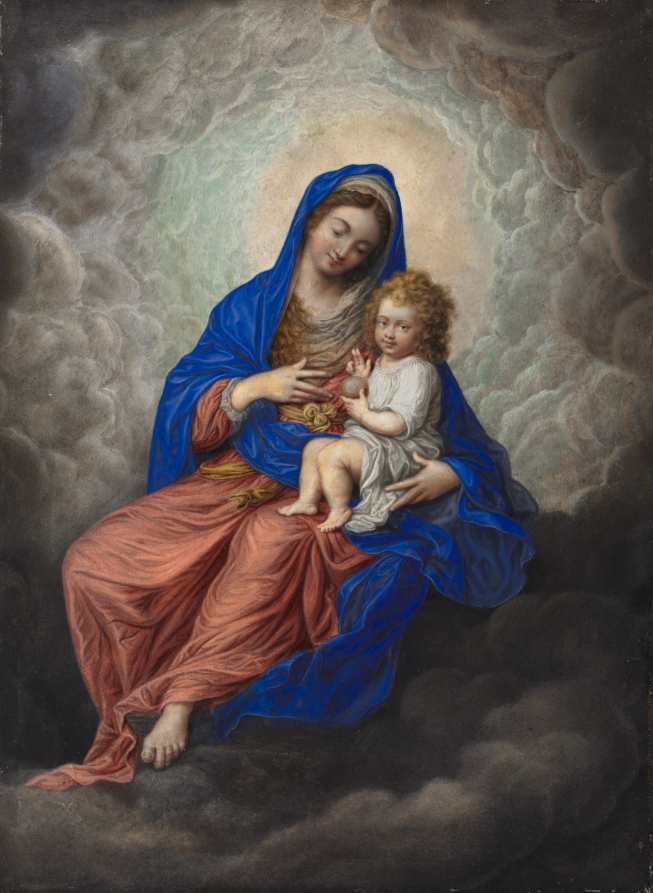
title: Madonna and Child in Glory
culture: England, 17th century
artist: Isaac Oliver (French, c. 1565–1617)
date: c. 1605–1617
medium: gouache and watercolor, heightened with gum arabic, with shell gold framing lines, on vellum, mounted on paper, vellum, and wood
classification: Portrait Miniature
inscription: signed with monogram in gold, lower right: "IO"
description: It is difficult to overstate the singularity of this work in 17th-century England. While the image has visual sources in works by Rubens and Federico Barocci, surely known to the cosmopolitan artist (who travelled to Italy, unusually for English artists at this moment), the object is iconographically unique. Oliver places a tender Virgin and Child (itself more closely linked to Catholic instead of Protestant imagery), in a heavenly, visionary setting, and incorporates the medieval iconography of the lactating Virgin with the Salvator Mundi, early Netherlandish in origin, but more commonly an Italian typology by the early seventeenth century.